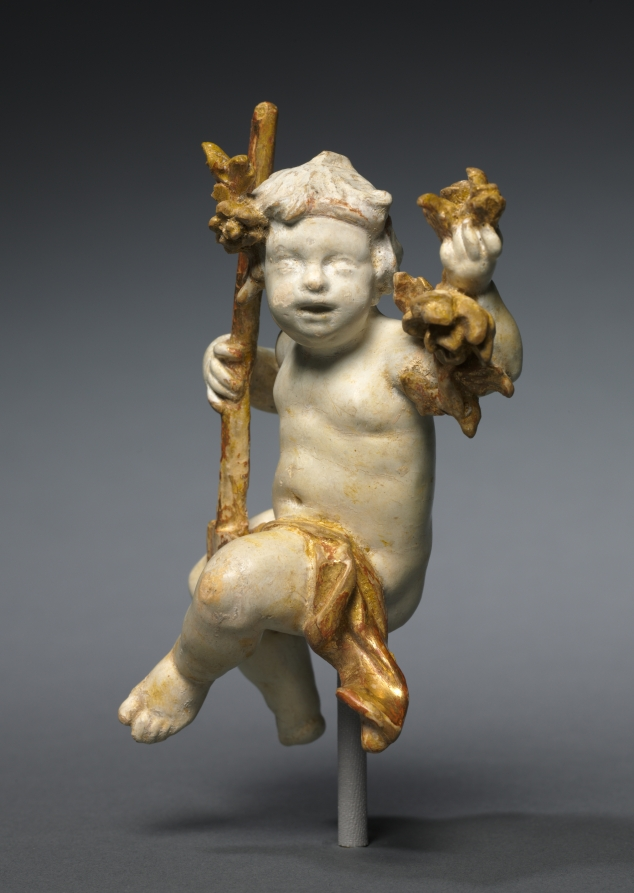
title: Putto as Spring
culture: Germany, 18th century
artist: Ferdinand Tietz (Austrian, 1708–1777)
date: c. 1765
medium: painted and gilded wood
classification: Sculpture